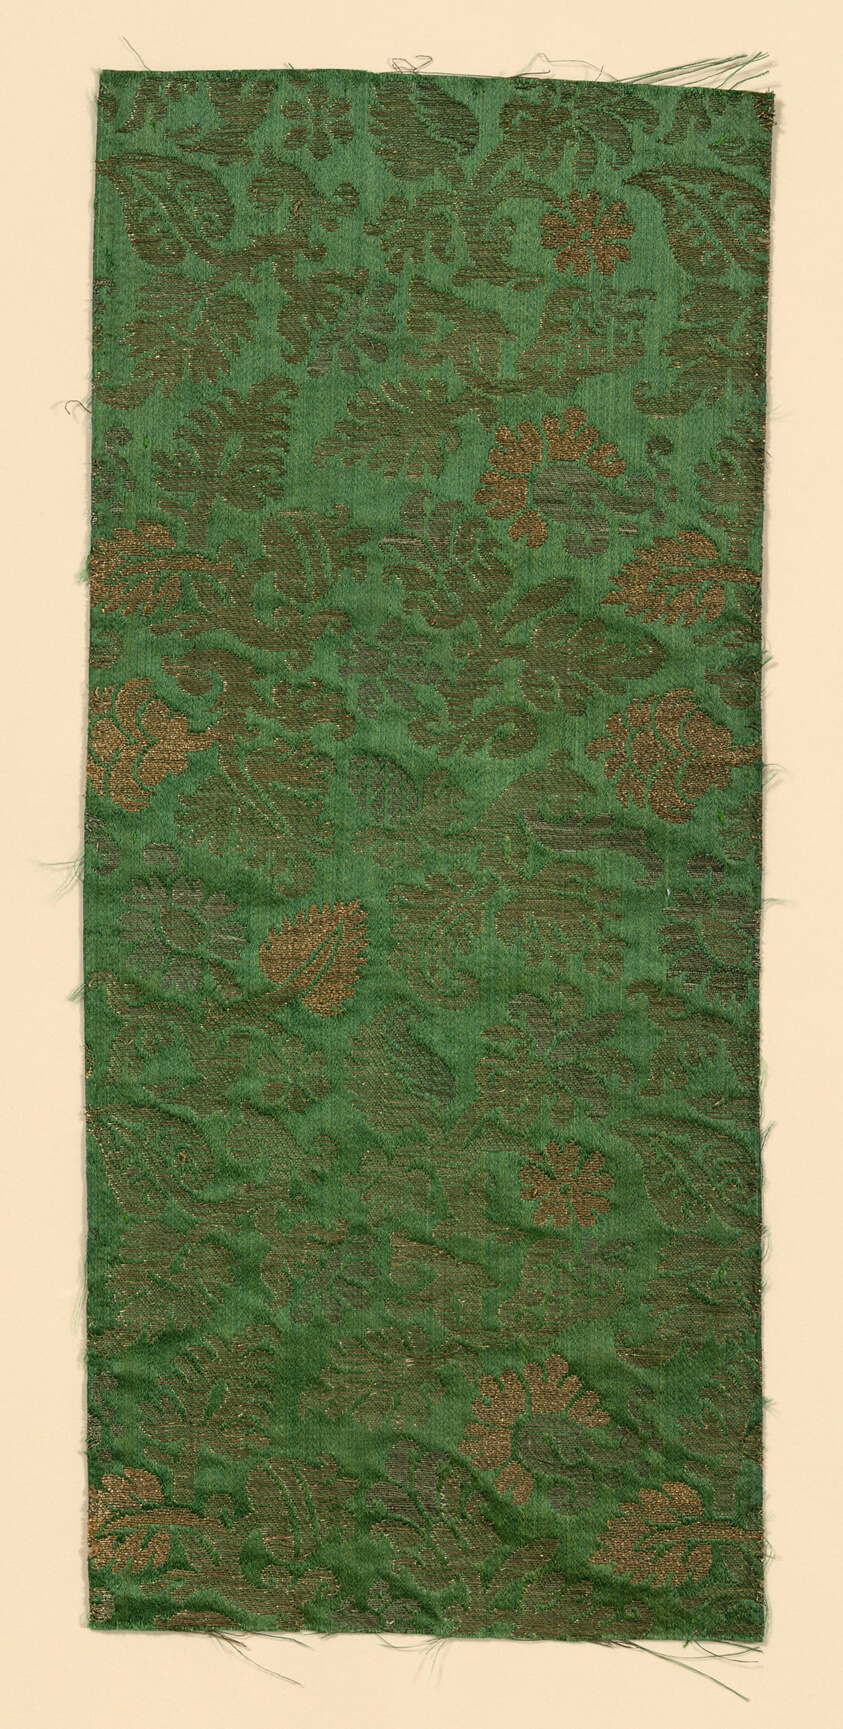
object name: Textile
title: Fragment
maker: Italy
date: 17th century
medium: Silk and silvered- and gilt-metal-strip-wrapped silk, warp-float faced satin weave with supplementary brocading wefts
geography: Italy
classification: textile; weaving